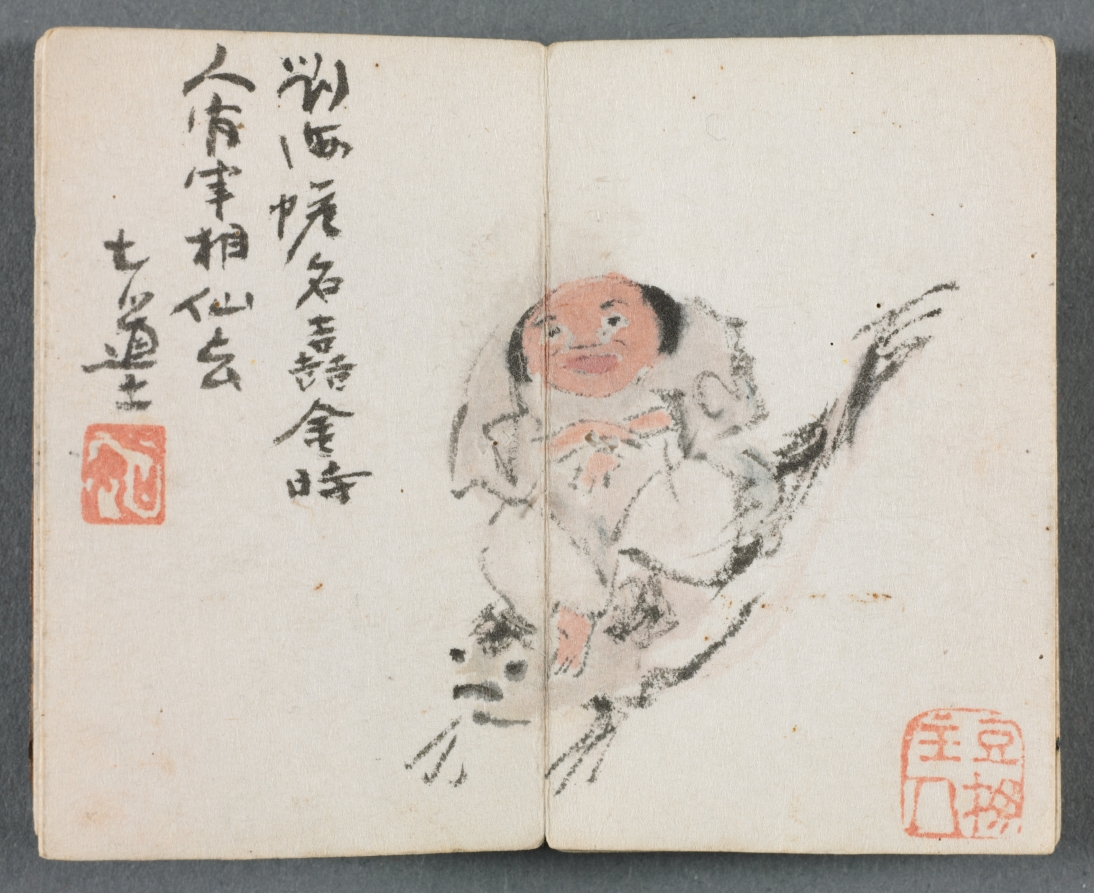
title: Miniature Album with Figures and Landscape (Man Riding Carp)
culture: China, Qing dynasty (1644–1911), Qianlong reign (1736–95)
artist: Zeng Yandong (Chinese, c. 1751–1827)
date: 1822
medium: album leaf, ink and color on paper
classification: Painting